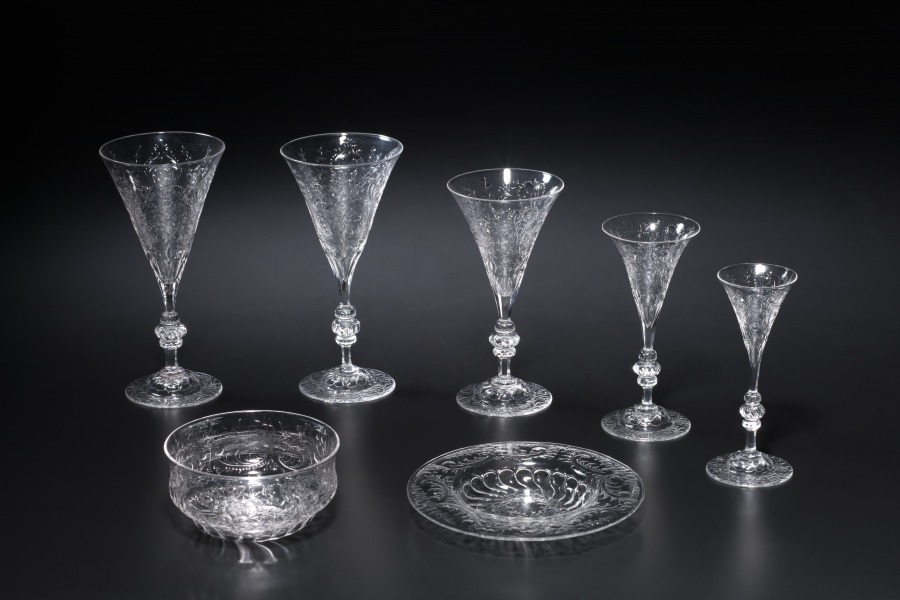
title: Place Setting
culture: probably America, late 19th-early 20th century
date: c. 1890–1920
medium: glass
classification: Glass